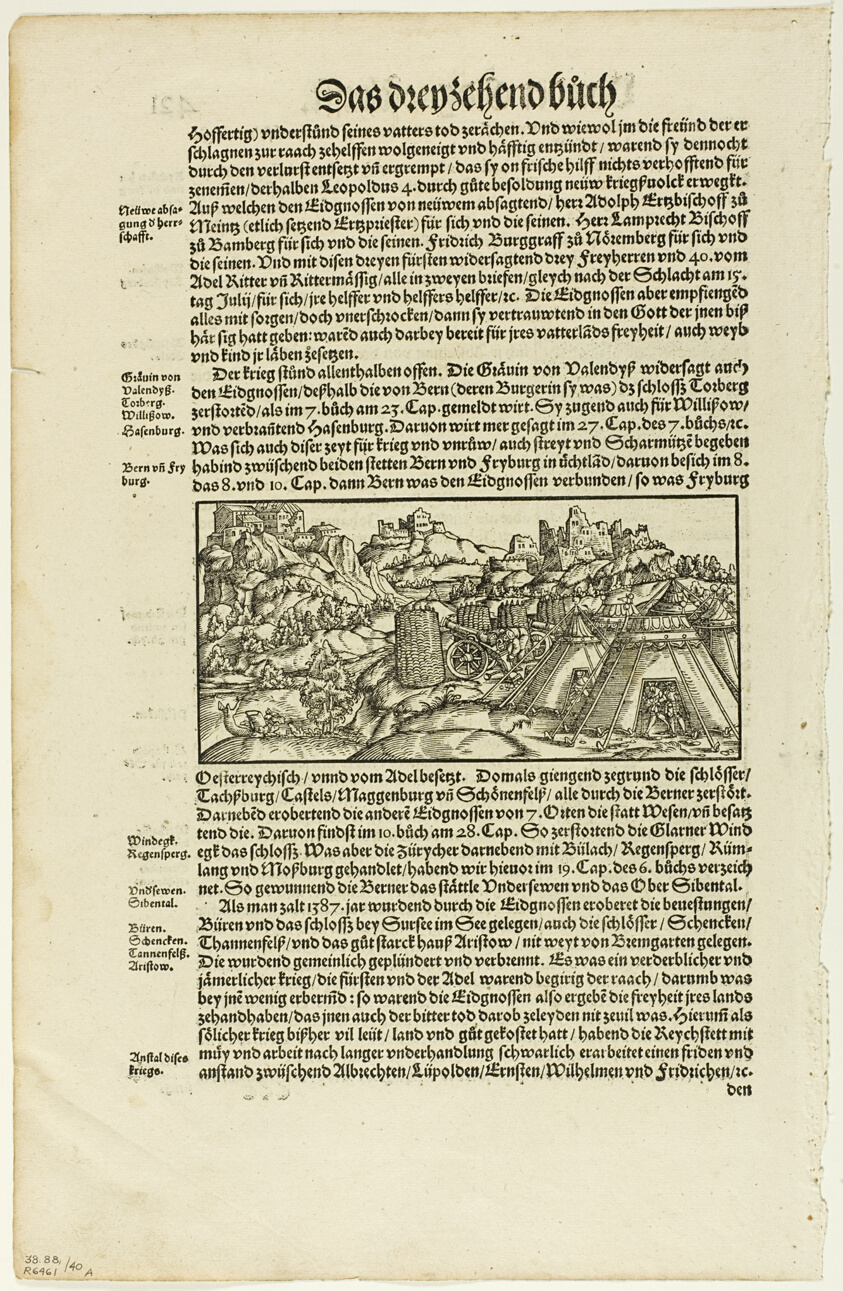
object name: Print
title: Illustration from Gemeiner loblicher Eydgnoschaft Chronick, plate 40 from Woodcuts from Books of the XVI Century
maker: Unknown Artist (Swiss, 16th century); assembled by Max Geisberg (Swiss, 1875-1943)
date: 1548, assembled into portfolio 1937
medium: Woodcut on paper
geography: Switzerland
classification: woodcut; print; prints and drawing